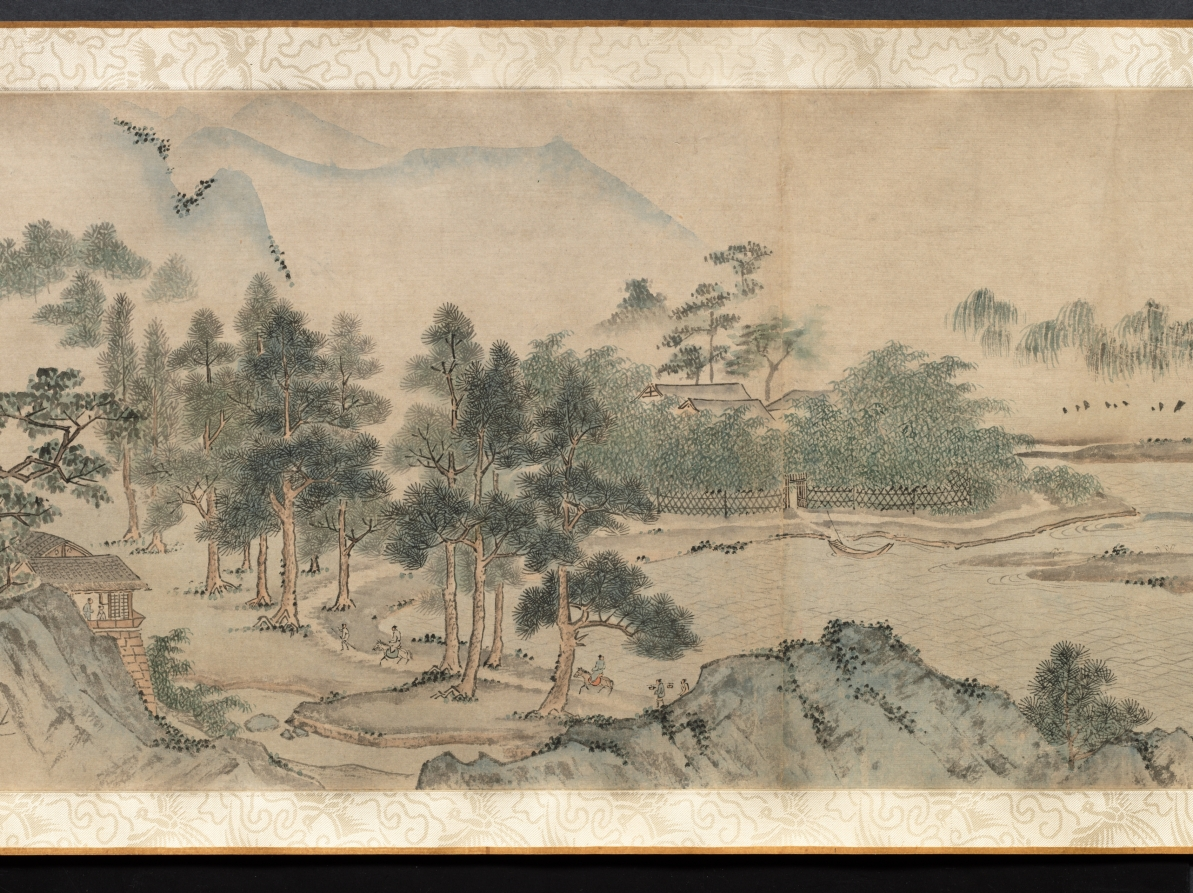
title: Ten Thousand Li of the Yangzi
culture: China, Ming dynasty (1368–1644)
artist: Dai Jin (Chinese, 1388–1462)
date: c. 1400s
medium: Handscroll; ink and color on paper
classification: Painting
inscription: Two colophons at end. Artist's seals: Dai Jin 戴進 and Wenjin 文進.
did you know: Dai Jin is traditionally considered the founder of the Zhe School, a style of landscape painting.